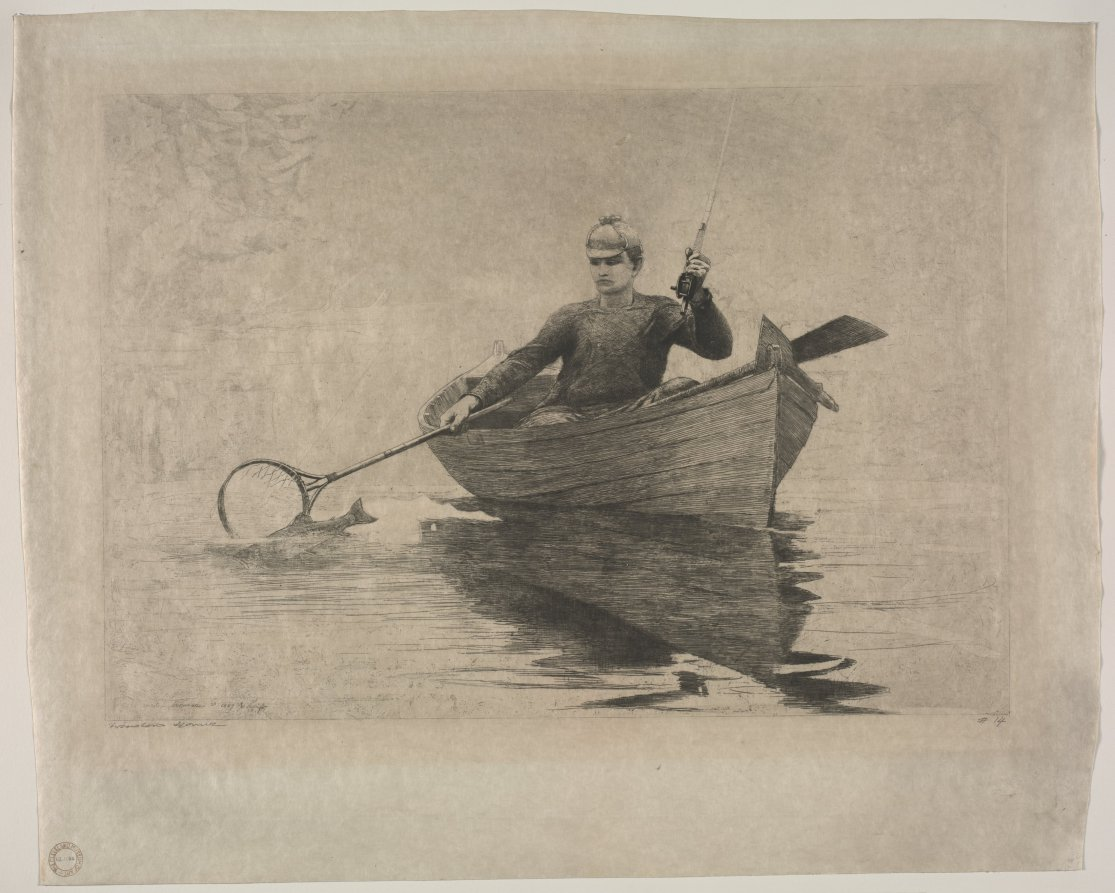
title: Fly Fishing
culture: America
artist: Winslow Homer (American, 1836–1910)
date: 1889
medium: etching and aquatint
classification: Print